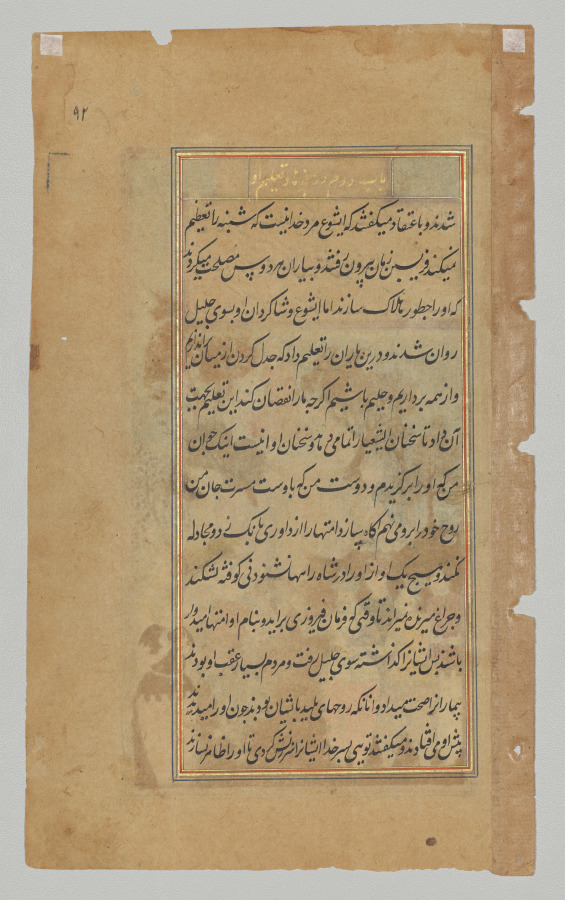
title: Text page from a Mirror of Holiness (Mir’at al-quds) of Father Jerome Xavier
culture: Mughal India, Allahabad, made for Prince Salim (1569–1627)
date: 1602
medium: Ink and gold on paper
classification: Manuscript